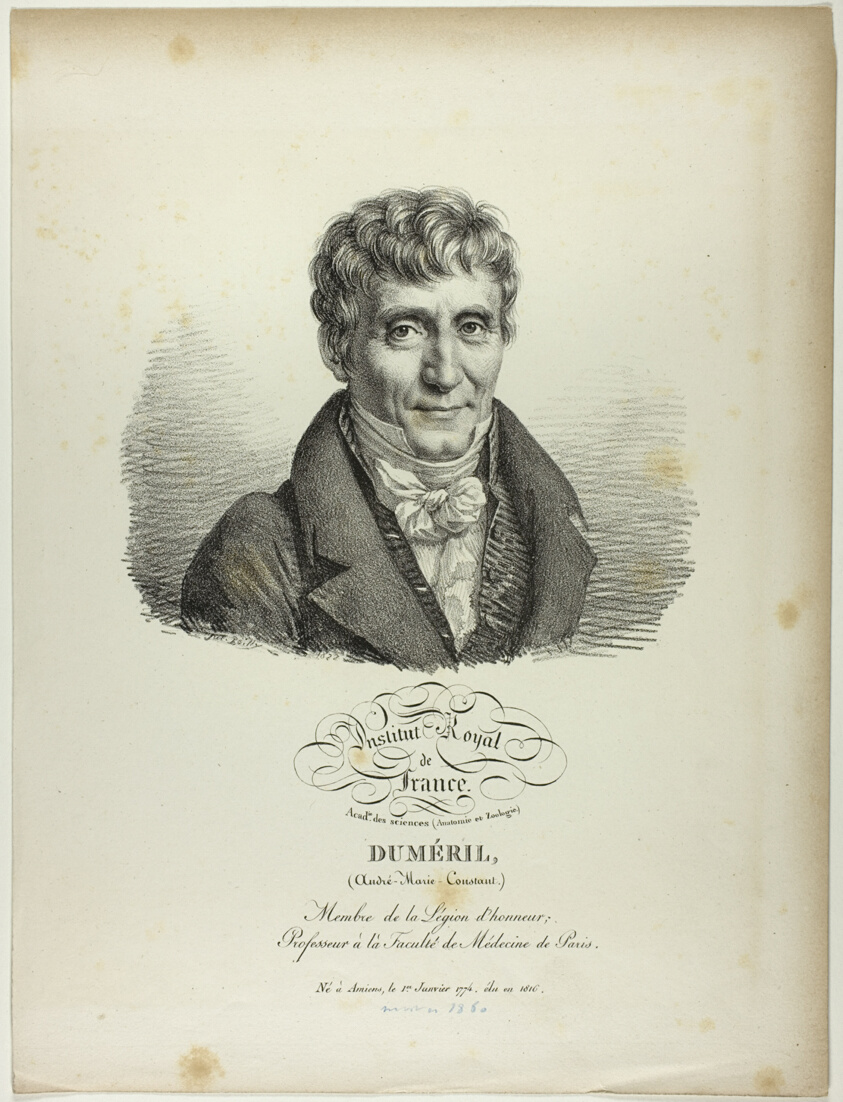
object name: Print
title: Portrait of André-Marie-Constant Duméril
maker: Jules Boilly (French, 1786-1874)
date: 1822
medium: Lithograph in black on ivory wove paper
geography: France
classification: lithograph; print; prints and drawing